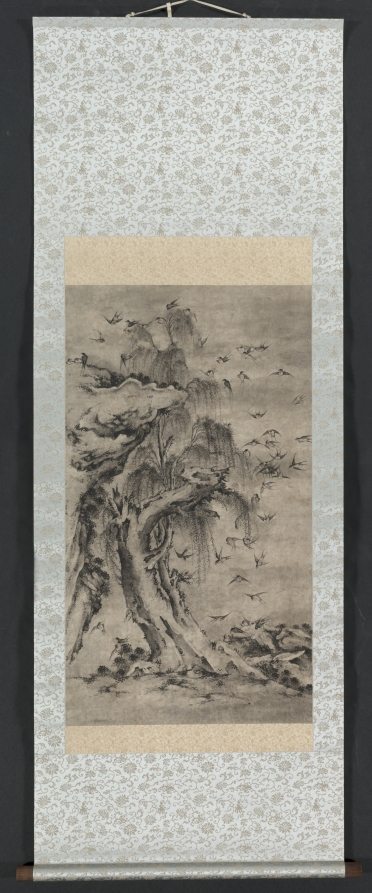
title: One Hundred Birds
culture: Japan, Edo period (1615–1868)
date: possibly 1600s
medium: hanging scroll; ink and slight color on paper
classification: Painting